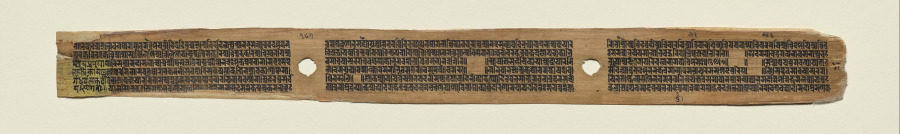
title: End of the Perfection of Wisdom in Eight Thousand Lines; Haribhadra’s final remarks; beginning of colophon, folio 187 (verso), from a Manuscript of the Perfection of Wisdom in Eight Thousand Lines (Ashtasahasrika Prajnaparamita-sutra)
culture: Eastern India, Bihar, Vikramashila Monastery. Painting: Nepal, Kathmandu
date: Sunday, September 14, 1119 (year 239 of the Newar Samvat in the month of Ashvina)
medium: Gum tempera and ink on palm leaf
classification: Painting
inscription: [[beginning of line 1 to the second half of line 6]] [tāvattathāgatastiṣṭha]tīti veditavyam / tāvattathāgato dharmaṃ deśayatīti veditavyam / avirahitāste ānanda sattvā buddhadarśanena dharmaśravaṇena saṃghopasthānena ca veditavyam / tathāgatāntikāvacarāste ānanda sattvā veditavyāḥ, ya enāṃ prajñāpāramita śroṣyantyudgrahīṣyanti dhārayiṣyanti vācayiṣyanti paryavāpsyanti pravartayiṣyanti deśayiṣyantyupadekṣyantyuddekṣyanti svādhyāsyanti likhiṣyanti satkariṣyanti gurukariṣyanti mānayiṣyanti pūjayiṣyantyarcayiṣyantyapacāyiṣyanti puṣpadhūpagandhamālyavilepanacūrṇacīvaracchatradhvajaghaṇṭāpatākābhiḥ, samantācca dīpamālābhiḥ, bahuvidhābhiś ca pūjābhiriti // idamavocadbhagavān āttamanāḥ / te ca maitreyapramukhā bodhisattvā mahāsattvāḥ āyuṣmāṃś ca subhūtirāyuṣmāṃś ca śāriputraḥ āyuṣmāṃścānandaḥ śakraś ca devānāmindraḥ sadevamānuṣāsuragaruḍagandharvaś ca loko bhagavato bhāṣitamabhyanandanniti // āryāṣṭasāhasrikāyāṃ prajñāpāramitāyāṃ parīndanāparivarto nāma dvātriṃśattamaḥ // samāptā ceyaṃ bhagavatyā āryāṣṭasāhasrikāyāḥ prajñāpāramitā sarvatathāgatajananī bodhisattvapratyekajinaśrāvakāṇāṃ mātā, dharmamudrā dharmolkā dharmanābhirdharmabherī dharmanetrī dharmaratnanidhānam akṣayo dharmaḥ acintyādbhutadarśananakṣatramālā sadevamānuṣāsuragandharvalokavanditā sarvasukhaheturiti // prajñāpāramitāṃ samyagudgṛhya paryavāpya ca dhārayitvā pravartya enāṃ viharantu sadārthina iti // [[end of the Perfection of Wisdom in Eight Thousand Lines (Ashtasahasrika Prajnaparamita-sutra)]]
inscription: [[line 6, after “hyatām //”, the beginning of the concluding remarks and the colophon]] ye dharmā hetuprabhāvā hetusteṣāṃ tathāgato hyavadat / teṣāṃ ca yo nirodha evaṃvādī mahāśramaṇaḥ // [[continues onto folio 188r]]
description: Haribhadra lived in the 800s, and the final remarks to his commentary on the Ratnagunasamcaya-gatha were copied at the end of this manuscript. The Ratnagunasamcaya-gatha distills the teaching of the Sanskrit Perfection of Wisdom into Prakrit verses.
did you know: The left corner of this page was repaired using yellow-colored Nepalese paper, indicating the importance of keeping the manuscript whole.